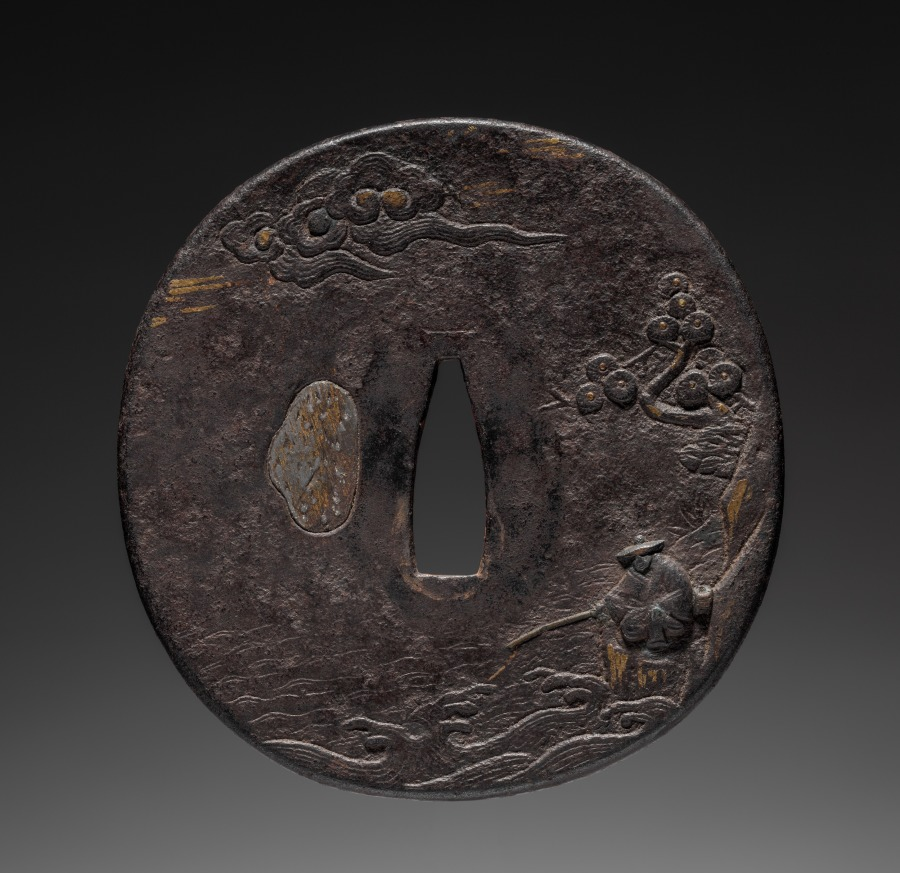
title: Sword Guard (Tsuba) with Chinese Landscape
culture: Japan, possibly Edo period (1615-1868)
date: c. 1615–1868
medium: iron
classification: Arms and Armor